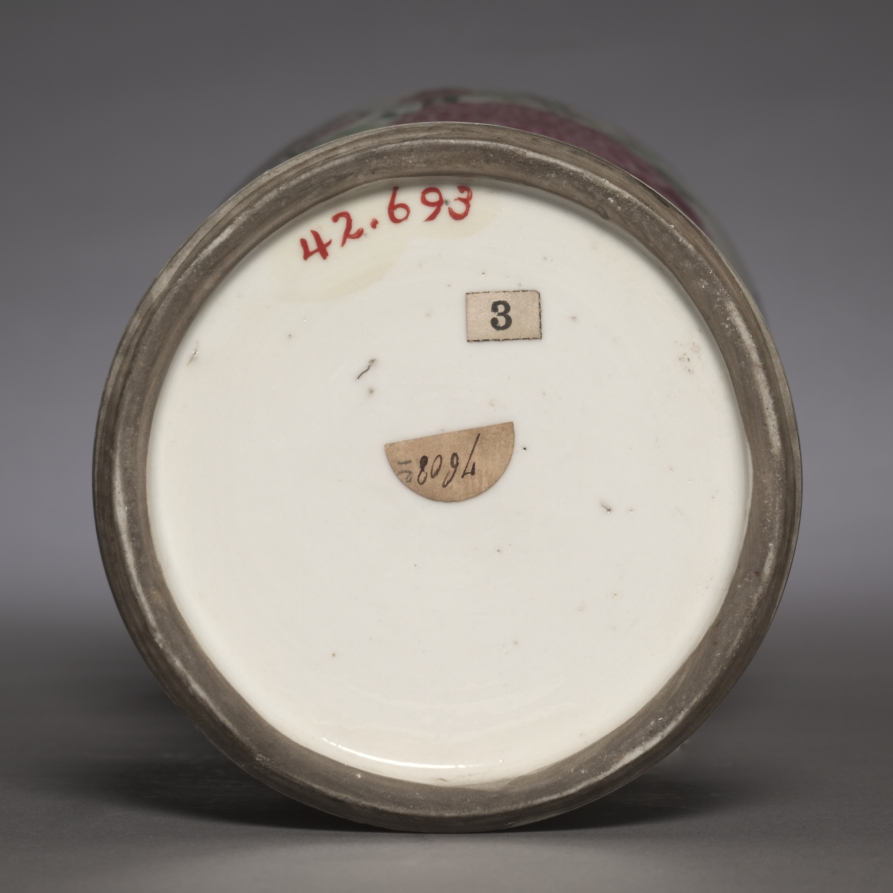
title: Vase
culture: China, Jiangxi province, Jingdezhen kilns, Qing dynasty (1644-1911), Yongzheng reign (1722-35)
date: 1723–35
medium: porcelain with famille rose overglaze enamel decoration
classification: Ceramic